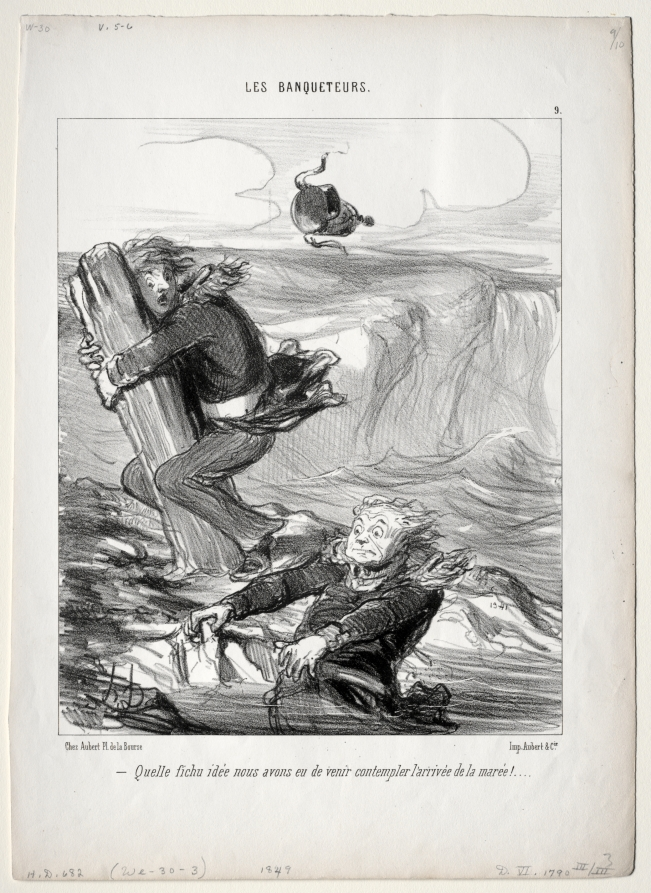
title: What a stupid idea we had...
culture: France, 19th century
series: The Banqueters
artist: Honoré Daumier (French, 1808–1879)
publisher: Aubert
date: 1849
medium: lithograph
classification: Print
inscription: Above image, printed: LES BANQUETEURS. / 9 ; Below image, printed: -Quelle fichu idée nous avons eu de venir contempler l'arrivée de la marée!....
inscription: Upper margin, in pencil: W-30 V. 5-6 / 9/10 ; lower margin, printed: Chez Aubert, Pl. de la Bourse / Imp. Aubert & Cie. ; in pencil: H.D. 682 / (We-30-3) / 1849 / D. VI.1790 III/III / 3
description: This print was published as plate 9 from the series The Banqueters.